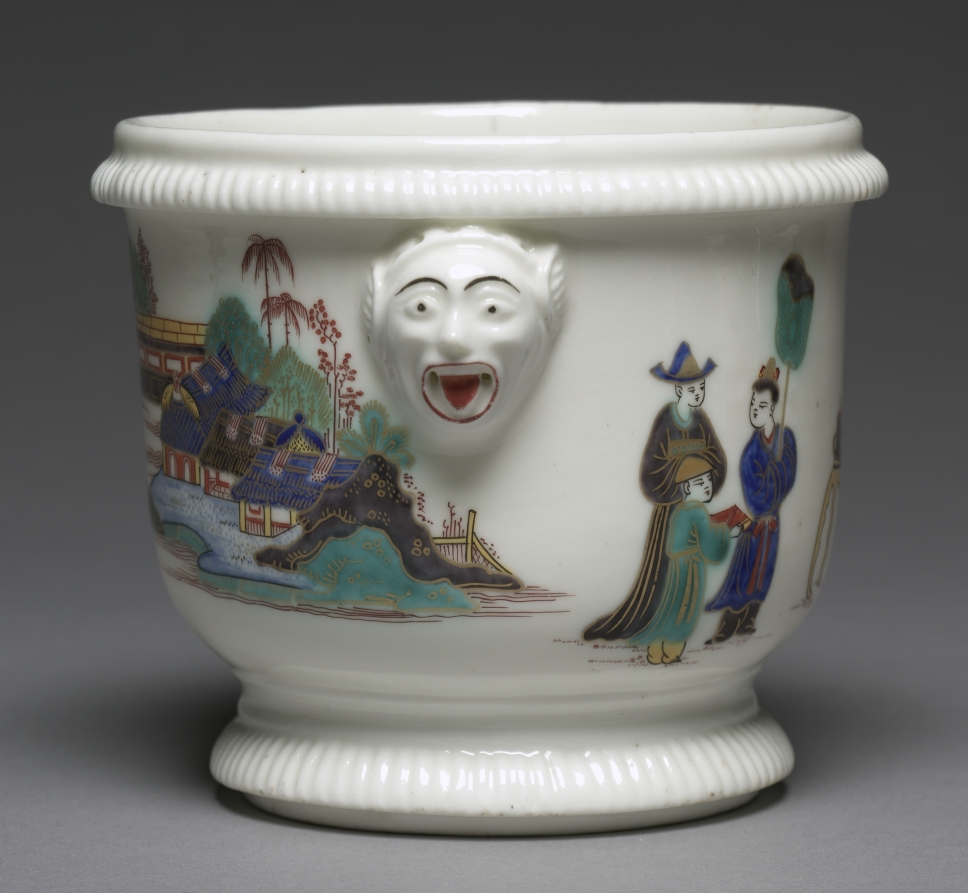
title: Bottle Cooler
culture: France, Saint Cloud, 18th century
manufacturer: Saint Cloud Porcelain Factory (French)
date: c. 1725– 1735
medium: soft-paste porcelain with enamel decoration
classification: Ceramic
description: The form of these cachepots is entirely typical of Saint-Cloud porcelain of about 1725. Their decoration, based upon Chinese porcelains of the so-called "famille-verte" type, is most unusual. Polychromed enamels were not often employed on Saint-Cloud porcelains, and figural scenes are very rare.